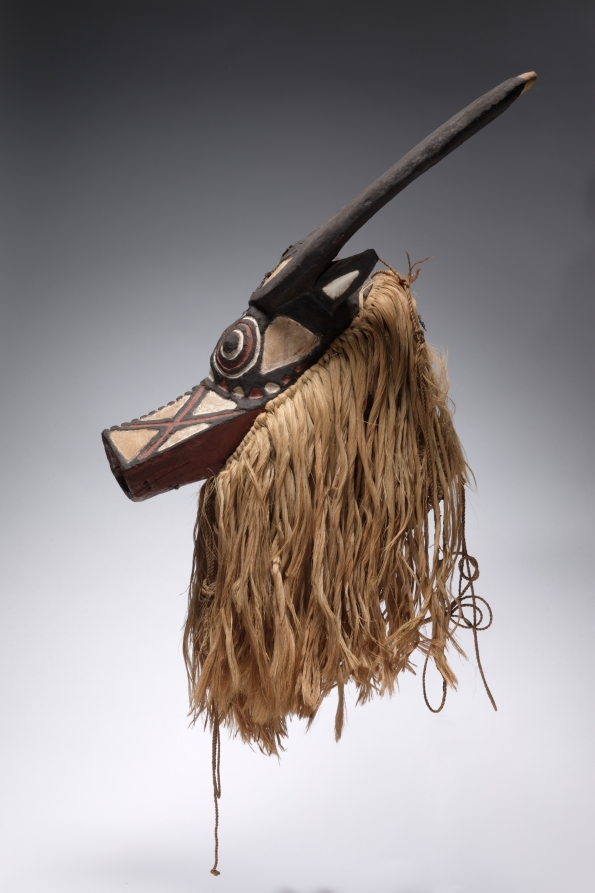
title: Buffalo Mask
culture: Africa, West Africa, Burkina Faso, possibly Bwa-style maker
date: early to mid-1900s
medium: Wood, plant fibers, paint, and iron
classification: Mask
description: Among the Bwa people, masks with human, animal, and fantastic traits typically represent protective bush spirits. This mask’s horns and muzzle identify it as a bush buffalo. Masked dancers appear during the dry season for initiations, funerals of elders, market days, harvest celebrations, and annual renewal rituals to protect the well-being of the community.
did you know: Once broken, the right horn of this mask was repaired; this indicates that it was valued.